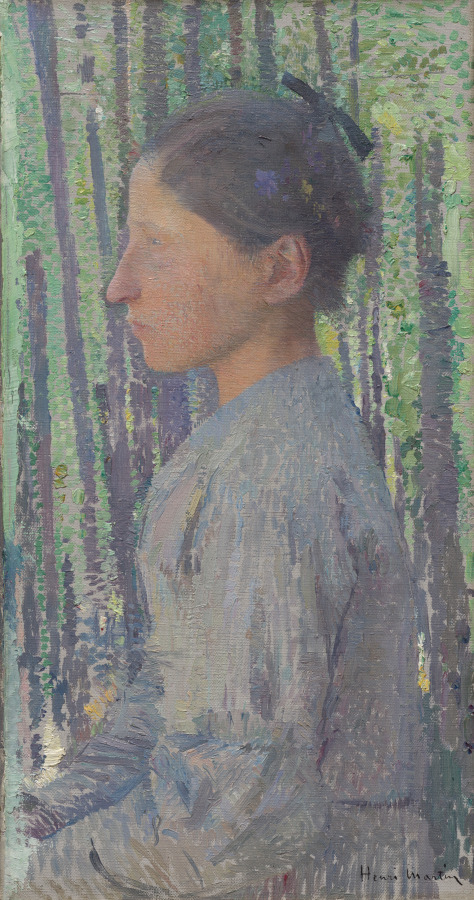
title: Woman in Profile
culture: France, 19th - 20th century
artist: Henri Jean Guillaume Martin (French, 1860–1943)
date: c. 1889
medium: oil on canvas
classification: Painting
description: Henri Martin was an important French painter from Toulouse known for his contributions to the Neo-Impressionist movement. He painted this striking depiction of a woman seated outdoors before tall trees at a moment when he was just beginning to develop his mature style. The figure and background are painted with short, thickly applied strokes of pure color, filling the composition with energy and life. The trees are rendered with small hatching strokes and form a background of nearly abstract, decorative shapes.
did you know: A highly celebrated artist during his lifetime, Henri Martin received commissions to produce large paintings to decorate the interiors of important buildings in Paris, including the Palais Royal, the Hôtel de Ville (city hall), the Sorbonne, the Palais de Justice, and Élysees Palace.